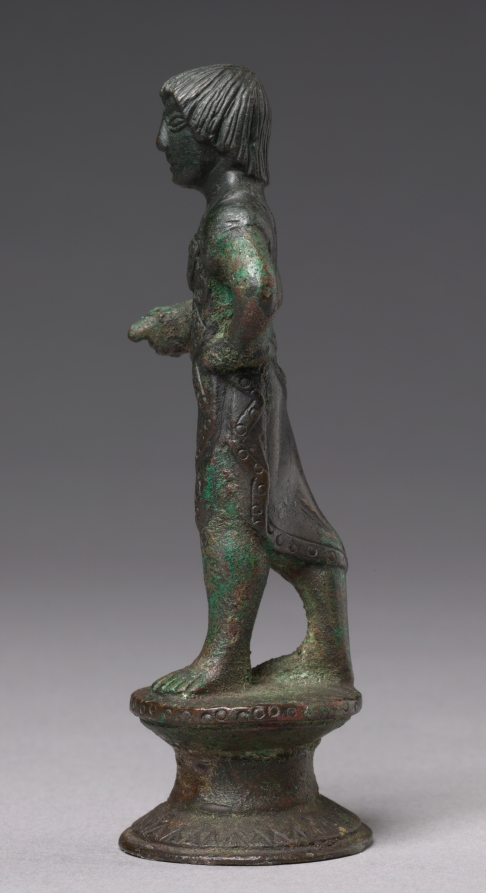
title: Statuette of a Youth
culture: Italy, Etruscan, Archaic Period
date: c. 520–500 BCE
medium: bronze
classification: Sculpture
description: Cast in one piece with its hollow base (perhaps designed to crown a candelabrum), this small bronze portrays a young man wearing a semicircular cloak adorned with punched circles along its edges. This likely represents an embroidered tebenna, an Etruscan forerunner to the Roman toga praetexta. He appears to stride forward, his right leg trailing behind and right hand extended, perhaps once holding an object.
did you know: Unusually, this figure places his hand on hip with thumb in front, fingers in back.